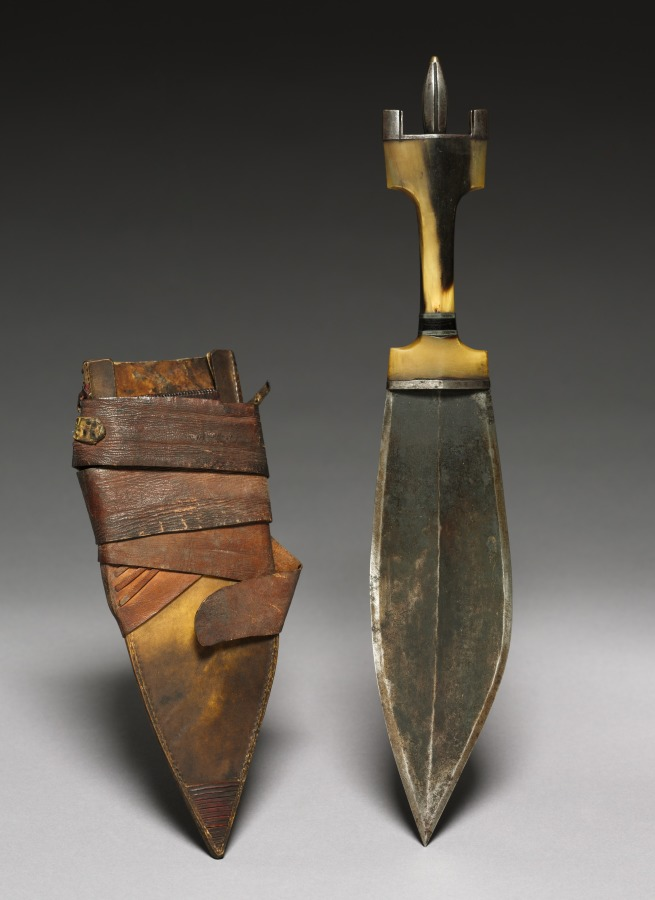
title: Knife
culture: Africa, unknown maker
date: 1800s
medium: Steel, leather or rawhide, and horn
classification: Arms and Armor